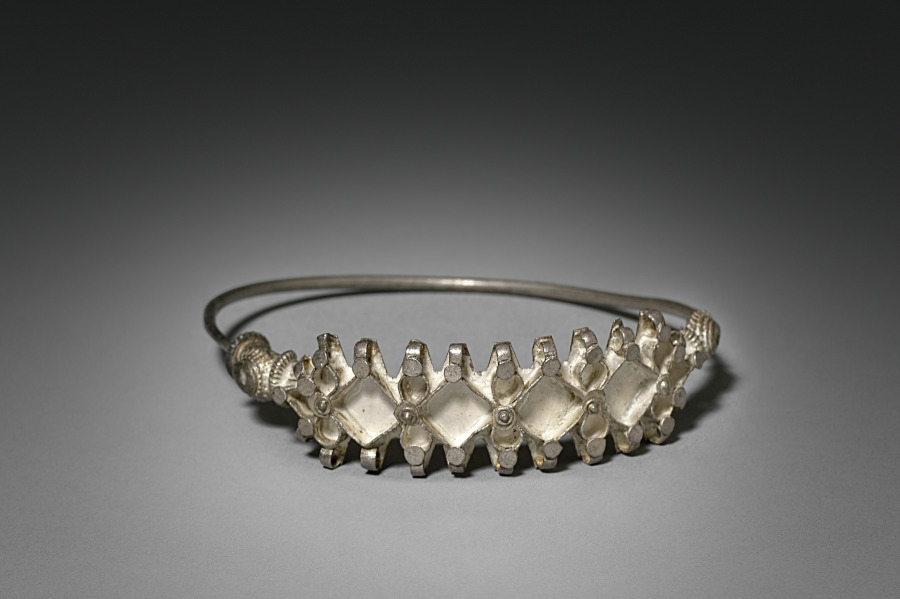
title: Nose Ring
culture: India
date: early 1900s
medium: silver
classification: Jewelry